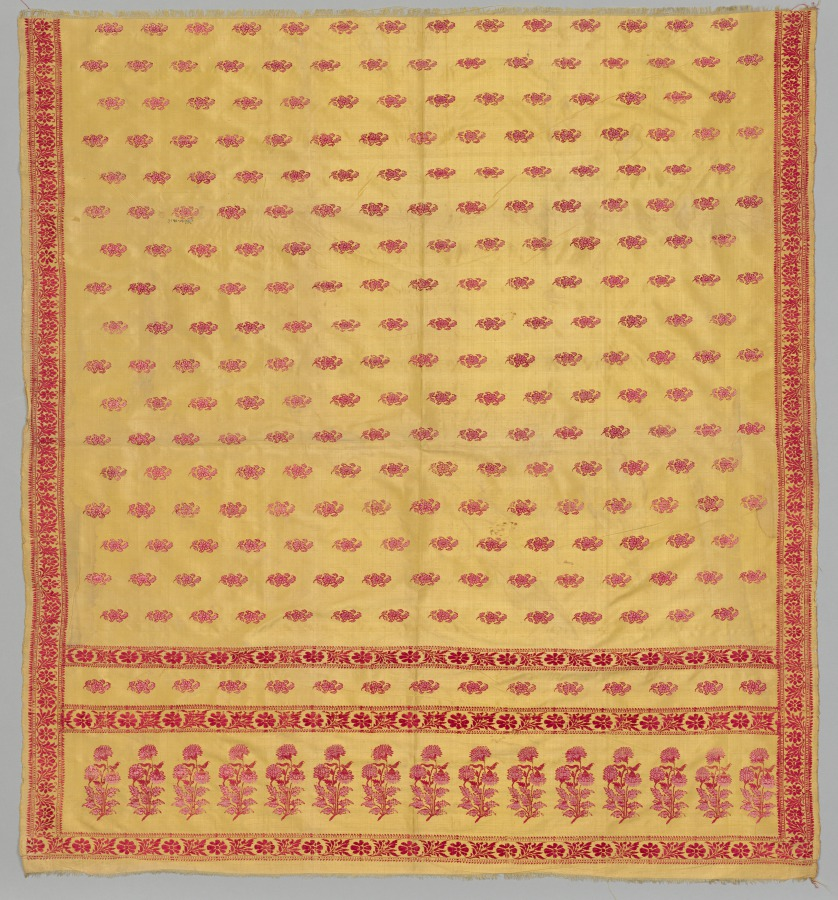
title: Part of a Sari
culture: India, Surat, 19th - 20th century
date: 1800s - early 1900s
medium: brocade, silk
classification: Textile